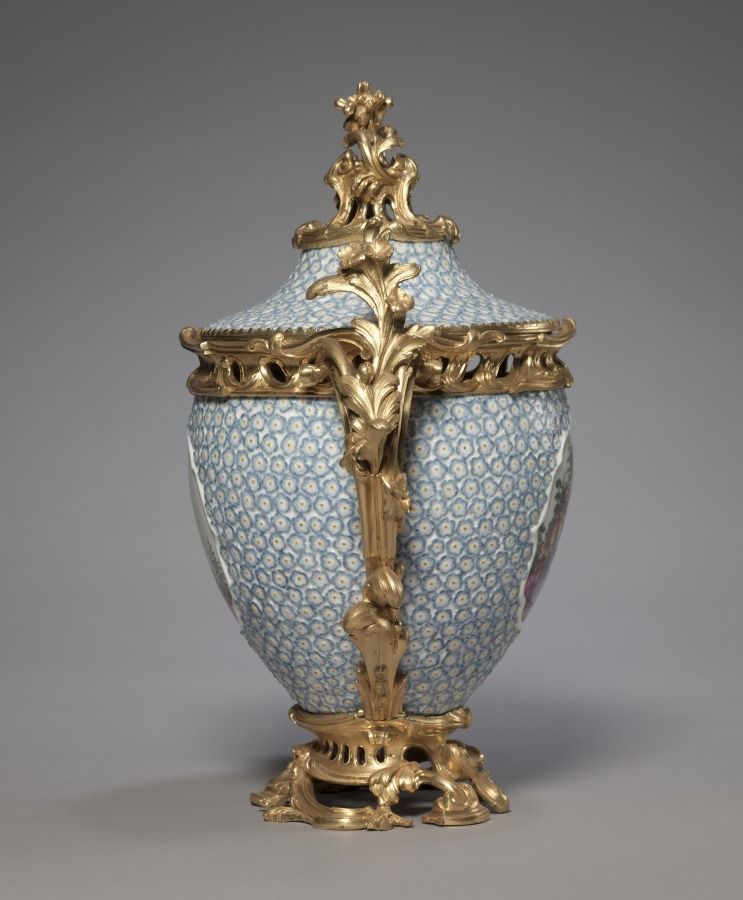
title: Covered Vase (2 of 2)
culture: Germany, Meissen, 18th century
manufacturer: Meissen Porcelain Factory (German, est. c. 1710)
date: mid-1700s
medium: porcelain mounted in gilt bronze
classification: Ceramic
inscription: on obelisk located in one of the cartouche openings, the date 1749 appears.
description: One of these vases is dated 1749. They were perhaps part of a set of four covered vases that we know from documents were acquired by Mme. de Pompadour, mistress of Louis XV in 1752.